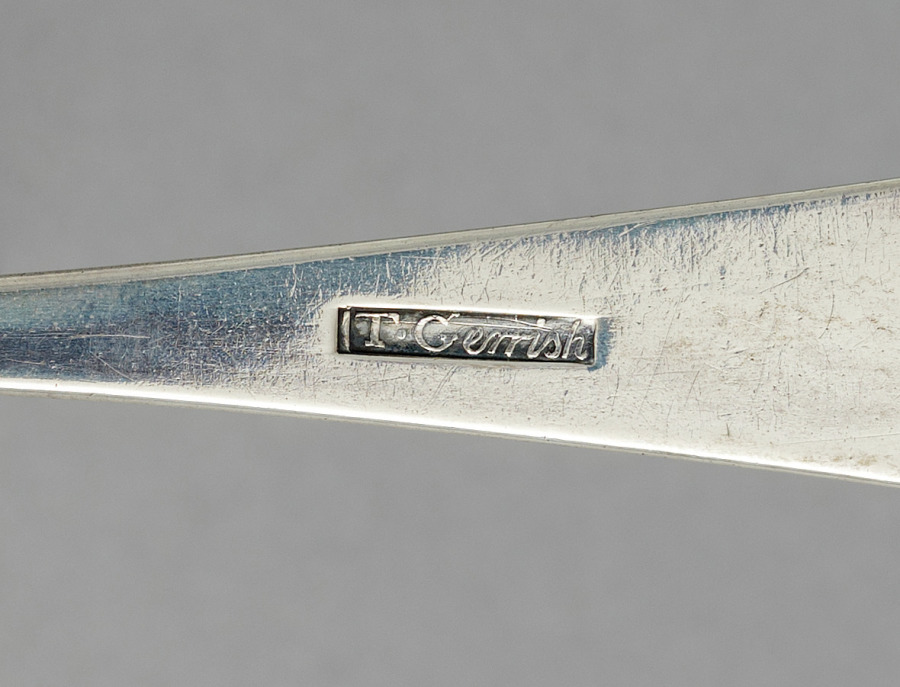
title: Teaspoon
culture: America, New Hampshire, Portsmouth, early 19th Century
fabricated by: Timothy Gerrish (American, 1749–1815)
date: 1804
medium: silver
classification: Silver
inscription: engraved "B" in bright-cut script on top of handle end.